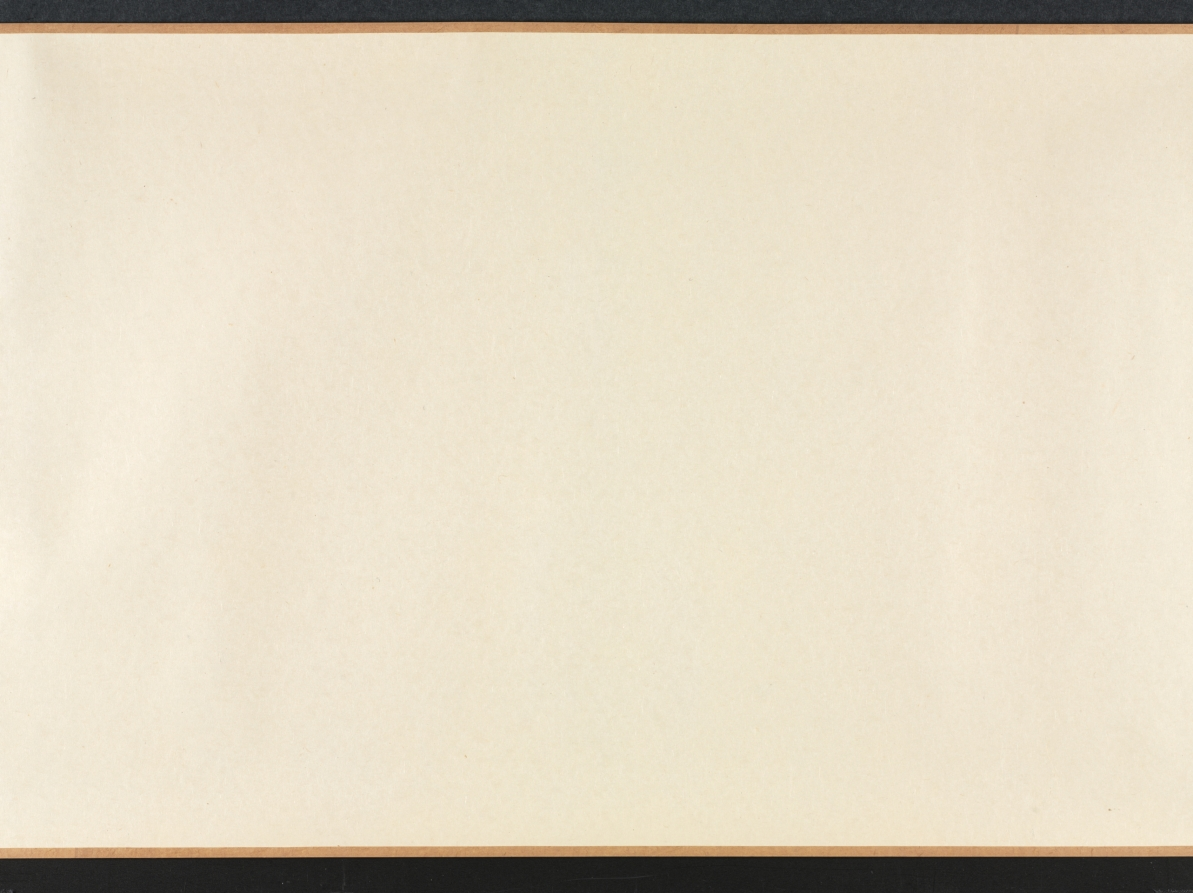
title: Hall of Lofty Pines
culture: China, Qing dynasty (1644-1911)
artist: Wang Hui (Chinese, 1632–1717)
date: 1703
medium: handscroll; ink and color on paper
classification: Painting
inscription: [題] 松喬堂圖 康熙癸未夏六月, 海虞耕煙散人王翬畫。[印]王翬之印; 石谷. [左下] 來青閣; 耕煙野老時年七十有二.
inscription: 松喬堂圖一卷，海虞石谷王君為靜海近公厲少司冦公作也。圖成于癸未之夏。未幾而公遂仙去。公令子今編修君南湖屬余題跋其後。余與公同官侍從，交契最深。側見公之清修純德，蔚為聖天子所眷重。侍直內廷，密勿贊襄，幾二十餘年。蒼生之所以受賜，士林之所以沐德者，天下莫能窺，在廷莫能悉。而公卒不言。以故宸衷日益契，恩禮亦日益渥。雖年逾懸車，時有歸老之念。而上固不聼公之去。其所謂松喬堂者，御書以賜公者也。蓋以松比公之清風勁節，而歲寒不改，經霜彌茂。則又以期公之壽考未有艾焉。公知此身未易乞，而山林槃磵之樂，止可寄諸寤思。此松喬堂圖之所由作也歟。石谷此圖，結構精密，筆墨超邁。其寫樹木之蒼蔚，堂宇之靚幽。恍見摩詰輞川樂天廬山之勝。獨惜公未得一日徜徉故園以償其願。即繪於圖亦未得以永其趣，此編修君之所以眷眷不忘也。雖然千歳之松喬，下蔭百畝，上以修棟梁之需。然則上當日名堂之意，不更望於後之人襲其芘而養其材也哉。吾願編修君之寶斯圖。并望君之塗塈丹雘，大其堂構也已矣。 康熈丙戍重陽三日，雲間王鴻緒跋。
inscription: 10 additional seals: 1 seal of Li Duna 勵杜納 (1628–1703); 4 seals of Zha Ying 查瑩 (jinshi of 1766); 5 seals of Li Yun (dates unknown).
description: Wang Hui 王翬, a leading painter in the orthodox school of the early Qing dynasty (1644–1911), was commissioned to paint this landscape with a country estate for Li Duna 勵杜納 (1628–1703), vice minister of justice in Emperor Kangxi’s court. The emperor had honored Li by granting him a piece of calligraphy with the name of Li’s retirement retreat, “Hall of Lofty Pines.” He drew a comparison between pines and Li’s upright character, resilience, and longevity. Wang Hui’s painting was supposed to allow Li to imagine living in a beautiful, secluded compound among the hills and pines. Sadly, Li died before seeing the completed painting and before receiving the emperor’s permission to retire. The landscape begins with peaceful riverbanks and low hills. The pines around the estate in the middle of the handscroll are truly lofty, some stretching even beyond the frame of the painting. Li Duna, the estate’s owner, is shown twice in his serene mountain retreat: first approaching the entrance to the compound with two servants at the right, and then later in the scroll, to the left, reading in the comfort of an inner room.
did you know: One servant carries the estate owner's carefully wrapped qin, a type of zither.